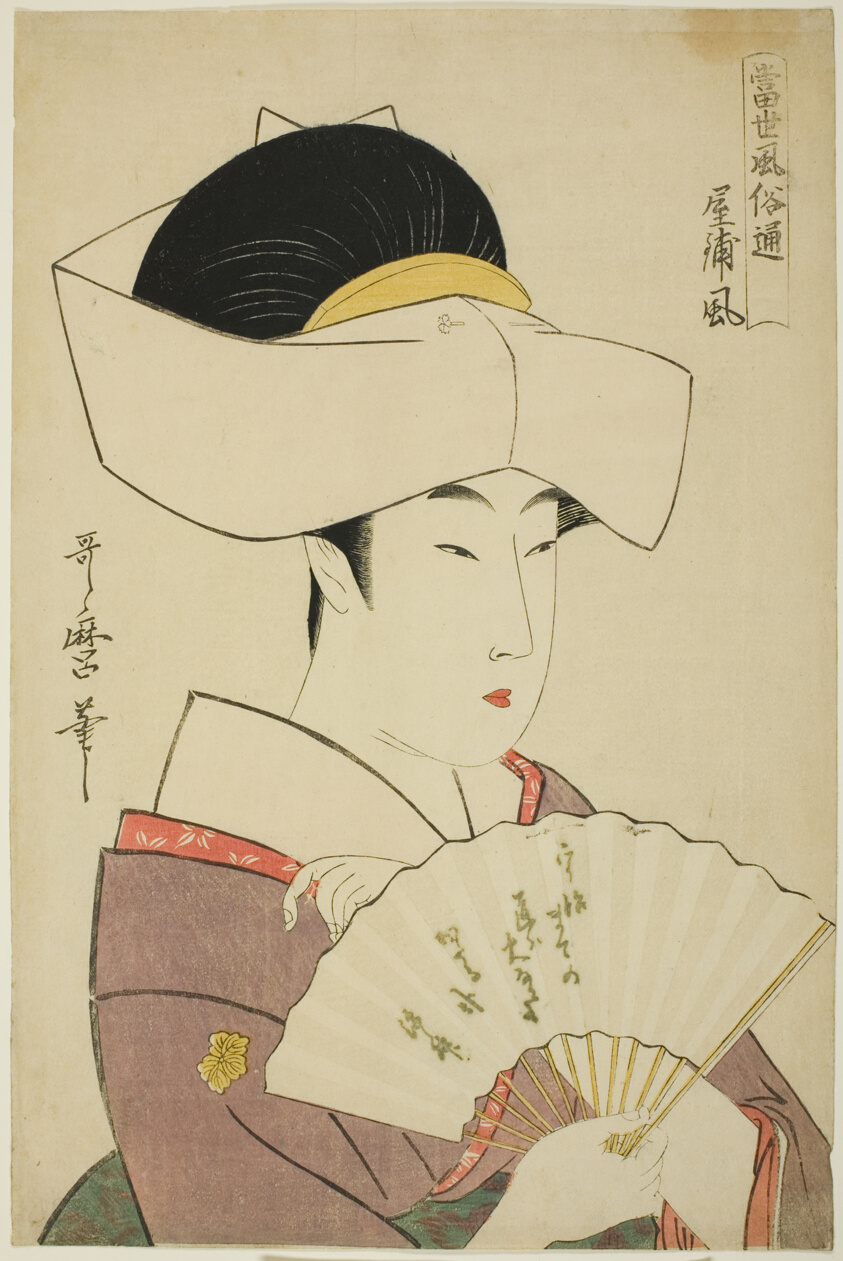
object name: Print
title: The Style of a Feudal Lord’s Household (Yashiki-fu), from the series Guide to Contemporary Styles (Tosei fuzoku tsu)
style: Japanese (culture or style)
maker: Kitagawa Utamaro 喜多川 歌麿; Japanese, 1753 (?)-1806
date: c. 1800/01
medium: Color woodblock print; oban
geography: Japan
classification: woodblock print; print; asian art